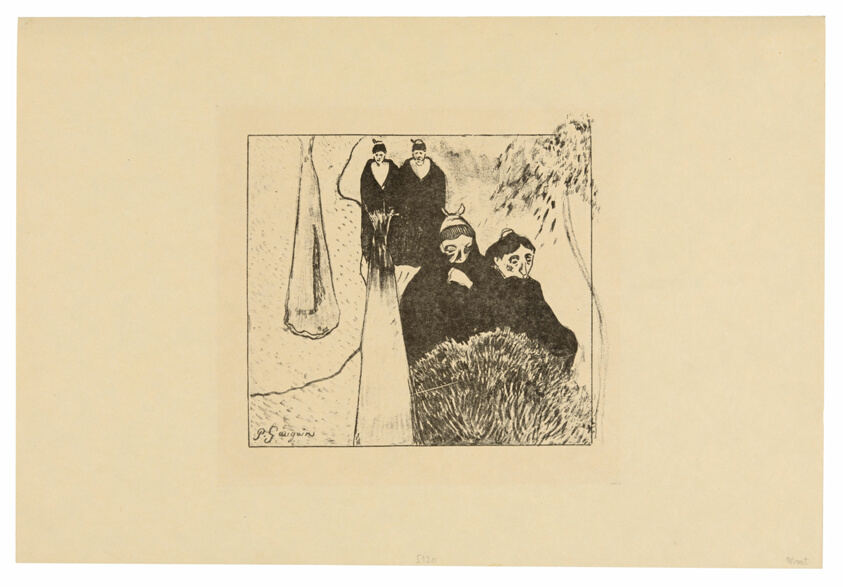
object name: Print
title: Old Women of Arles, from the Volpini Suite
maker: Paul Gauguin (French, 1848-1903); published by Ambroise Vollard (French, 1867-1939)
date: 1889, printed after 1911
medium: Zincograph in black on ivory wove paper (an imitation Japanese vellum)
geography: France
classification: zincograph; lithograph; print; prints and drawing